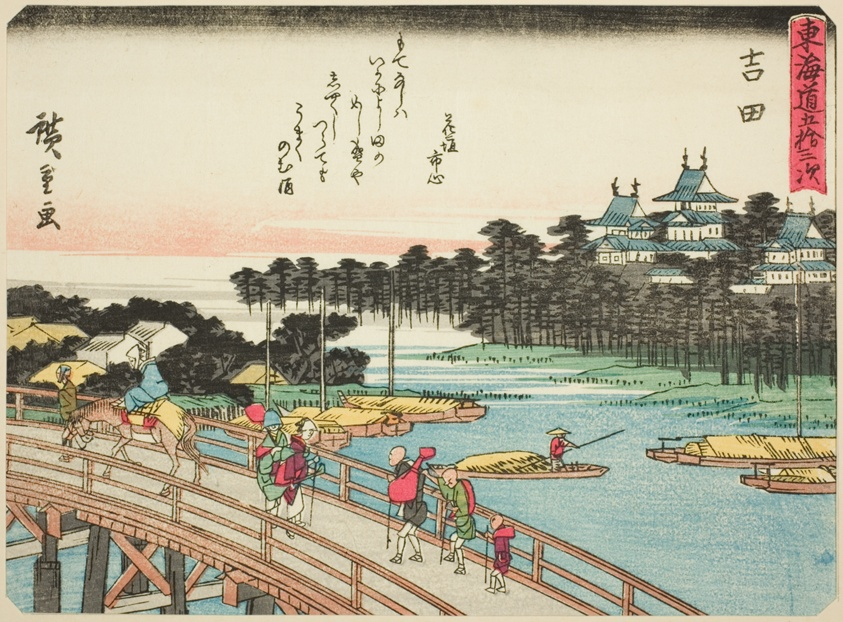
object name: Print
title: Yoshida, from the series "Fifty-three Stations of the Tokaido (Tokaido gojusan tsugi)," also known as the Tokaido with Poem (Kyoka iri Tokaido)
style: Japanese (culture or style)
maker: Utagawa Hiroshige 歌川 広重; Japanese, 1797-1858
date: c. 1837/42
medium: Color woodblock print; chuban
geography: Japan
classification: woodblock print; print; asian art